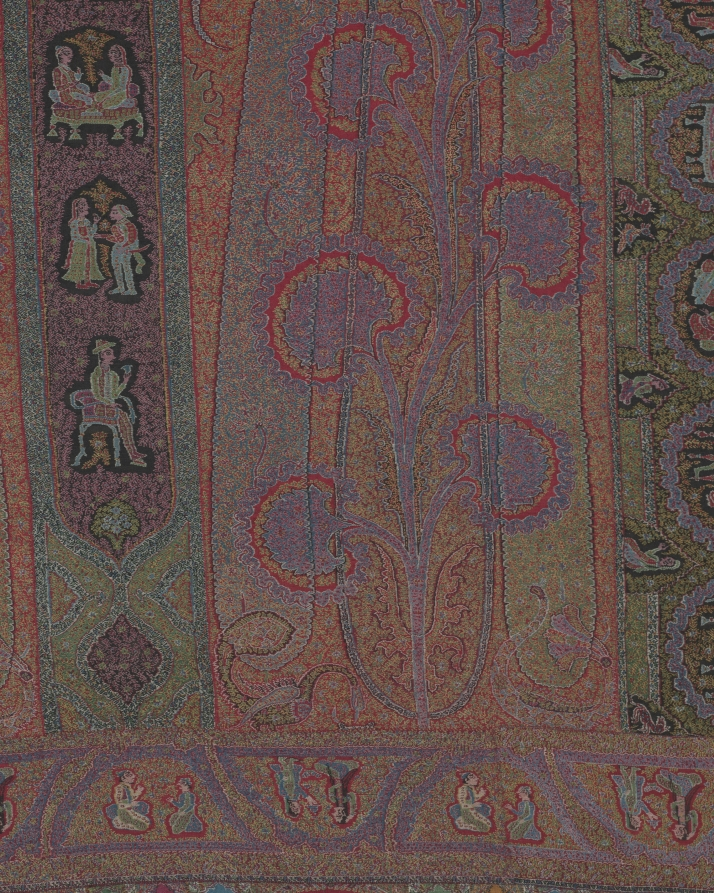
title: Long shawl with woven figures and animals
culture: India, Kashmir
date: c. 1885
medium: 2/2 twill tapestry weave, double interlocked and pieced: wool (possibly pashmina)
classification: Textile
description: Kashmir shawls from India were status symbols in Europe during the 1800s, and few are as rare as this woven example. Over 200 human figures take part in drinking, smoking, dancing, and falconry in the Indian princely scenes that enliven the shawl’s borders and four dark stripes. The stripes alternate with large elongated boteh, or paisley, motifs that intertwine with blossoming stems in a European style adapted by Kashmiri textile artists. This extraordinary woven shawl was probably made to dazzle the jury at one of the European expositions of industrial products, as almost all other figural shawls were embroidered. It was woven in many pieces and then skillfully joined with colorful harlequin end borders.